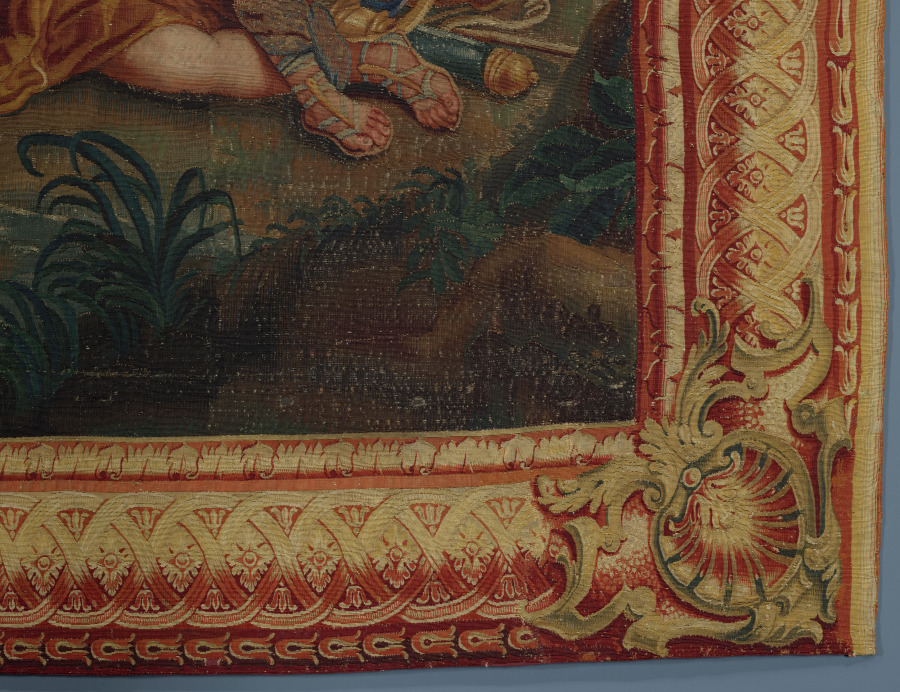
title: Diana's Return from the Chase (from Set of Ovid's Metamorphoses)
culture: France, 18th century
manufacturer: Gobelins Manufactory (France, Paris, est. 1662)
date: 1704–1731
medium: tapestry weave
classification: Tapestry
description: This tapestry’s elaborate border emulates a gilt picture frame, a key characteristic of eighteenth-century Gobelins tapestries. It portrays the goddess Diana at two distinct moments, during and following the hunt, the first accompanied by three dogs, and the second reclining among five attendants. The figures are positioned in a lush landscape near a small stream. A putto, poised to place an arrow in his bow, hovers above Diana. Goddess of the hunt and associated with wild animals and the moon, Diana can be identified by the crescent worn above her forehead. The dead hares indicate a successful hunt.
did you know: During the French Revolution, Gobelins tapestries were sometimes disassembled to harvest the gold threads.